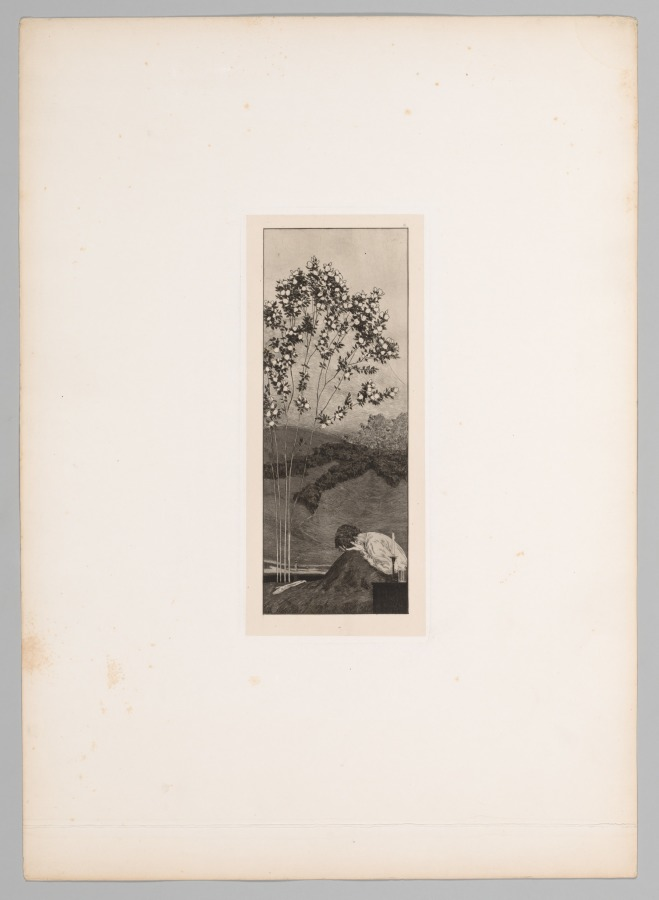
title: A Glove: Desires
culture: Germany, 19th century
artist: Max Klinger (German, 1857–1920)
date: 1880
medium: etching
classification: Print